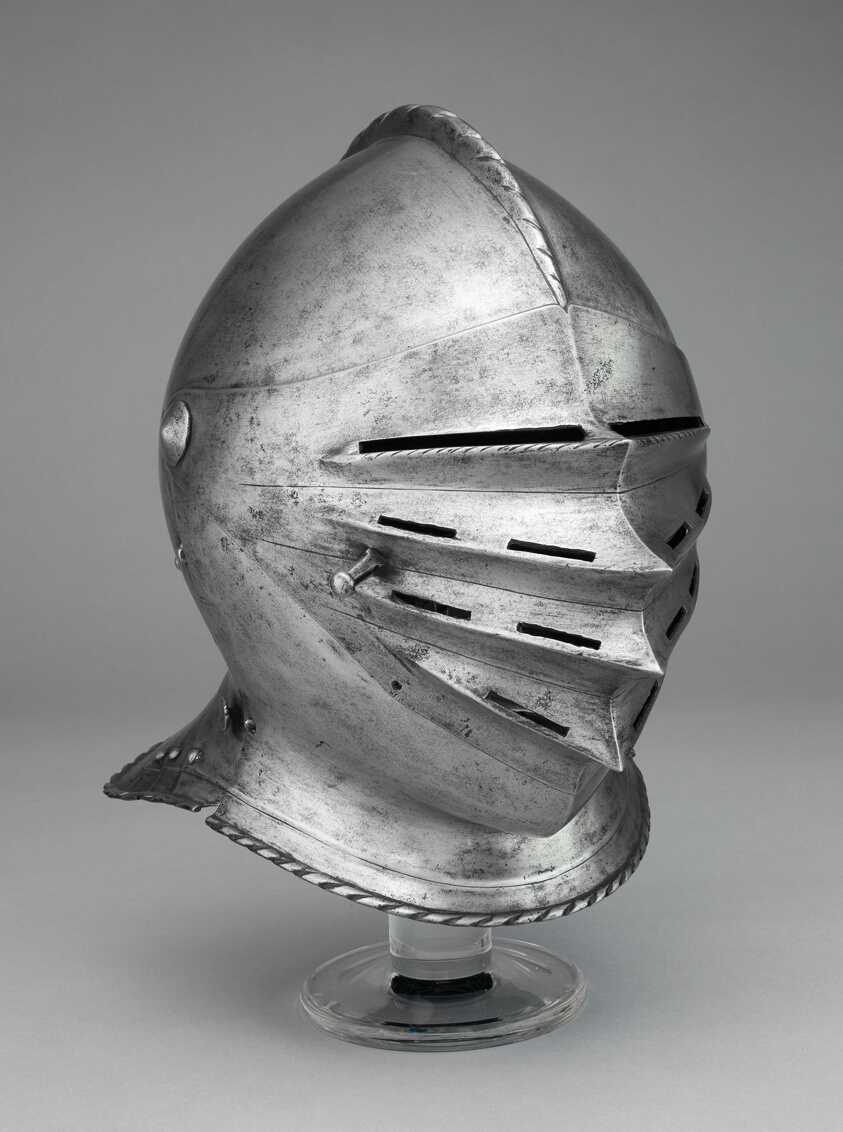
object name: Armor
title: Close Helmet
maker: South German; Nuremberg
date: 1520/30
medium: Steel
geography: Nuremberg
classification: suit-helmet; armor; arms and armor